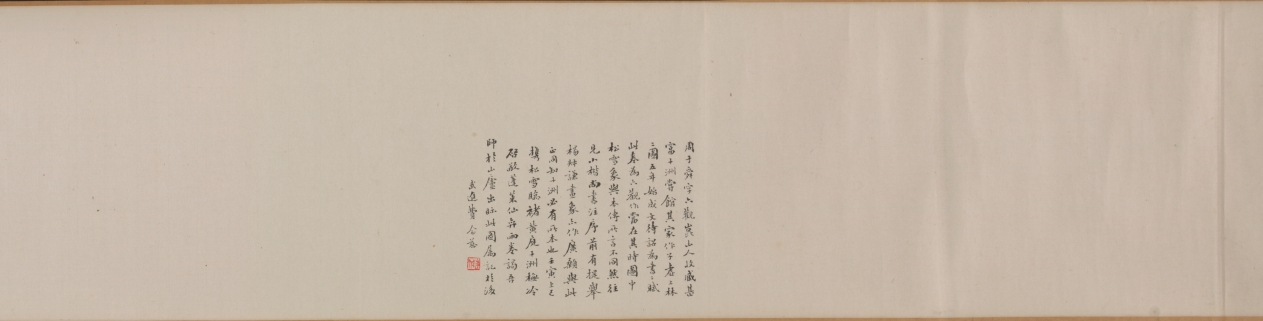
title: Zhao Mengfu Writing the Heart (Hridaya) Sutra in Exchange for Tea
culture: China, Ming dynasty (1368–1644)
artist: Qiu Ying (Chinese, 1494–1552)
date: 1542–43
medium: handscroll, ink and light color on paper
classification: Painting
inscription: Inscription accompanying text of "Heart" sutra, by Wen Zhengming 文徵明 (1470-1559): Zhengming 徵明, written in a boat at Kunshan 崑山, on the twenty-first day of the ninth month, in the renyin 壬寅 year, the twenty-first year of the Jiajing era [1542].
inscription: Colophon by Wang Shih-mou: Chou Yü-shün [Feng-lai] of K'un-shan was a scholarly, refined connoisseur of antiquities. He had acquired the poem written by Chao Ch'eng-chih [Chao Meng-fu] about the exchage of tea for Chao's calligraphy of the Prajna sutra. But the sutra itself, also written by Chao Meng-fu, is lost. He therefore asked Ch'iu Shih-fu [Ch'iu Ying] to do a painting and had Wen Cheng-ming, the artist-in-attendance, write the Hridaya Sutra in the "small, regular" style for replacement. Both works are so excellent that even Chao Meng-fu himself would certainly applaud if he should be reborn to see them. I, Shih-mou, had gotten possession of this scroll from the family of Chou Yü-shün, and since it was so wonderfully matched with one of the treasures in my collection. the Hridaya Sutra written by Chao Meng-fu for Priest Li in "running script," like the reuniting of two halves of a jade pi, I completed the scroll with the several colophons written for the "tea-exchange" poem. I did this because the painting of Ch'iu Ying and the calligraphy of Wen Cheng-ming are definitely masterpieces by themselves with absolutely no need to depend on any of the colophons written for the Chao Meng-fu poem. Furthermore, the two sons of Wen Cheng-ming, Shou-ch'eng [Wen P'eng] and Hsiu-ch'eng [Wen Chia]. have each written a colophon explaining the reason for replacing the calligraphy. As their writings are both acceptable for high standard, I didn't want to throw them away. [So by separating these into two scrolls] I was able to get two complete works of art in one clever stroke. I was quite pleased with myself, and hope that those who see this scroll shall not get suspicious because of the missing colophons. Wang Shih-mou wrote in his Jih-sun-chai study, on the first day of the tenth month, in the chia-shen year of the Wan-li era [1584].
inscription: Colophon by Wen P'eng: I-shao [Wang Hsi-chi] wrote in exchange for a flock of geese. Su Tung-po wrote in exchange for meat. Both episodes have become legends of a thousand years. Sung-hsüeh [Chao Meng-fu] "teased" Priest Kung for tea, and the story was immediately immortalized in the poems by all the famous scholars of the times. Indeed, how could one say his humor and elegance are not equal to the ancient worthies? Unfortunately, the poetry has survived but the writing of the sutra is lost. Yü-shün [Chou Feng-lai] therefore asked my father to make up the writing and so here is the complete work of art. Respectfully inscribed by Wen P'eng in the mid-summer of 1543.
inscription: Colophon by Wen Chia: Sung-hsüeh [Chao Meng-fu], in exchanging tea leaves for his writing of the Prajna, had put himself in the company of Yu-chün [Wang Hsi-chih] who exchanged geese for his writing of the Huang-t'ing sutra [the Yellow Chamber, or the Wai-ching ching, a Taoist text attributed to the Yellow Emperor]. However, was this romantic and cultivated gesture really intended for such small things? Actually, he was only proud that the excellence of his calligraphy had made him worthy to be the successor of the Ch'in Dynasty master. Since, very unfortunately, Chao Meng-fu's writing [of the Prajna] was already lost, my father therefore agreed to replace it, and did the calligraphy in the style of the Yellow Chamber. In addition, Yu-shün [Chou Feng-lai] had asked Mr. Ch'iu Shih-fu [Ch'iu Ying] to do a painting of the sutra writing story in the style of Li Lung-mien at the head of the scroll. Now it would seem the entire episode should go down in history for immortality. Respectfully recorded by Wen Chia, on the eighth day of the eighth month, in the year of k'uei-mao [1543]. trans. WKH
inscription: 4 colophons and 23 seals: 1 colophon, dated 1543, and 2 seals of Wen Peng (1498-1573); 1 colophon, dated 1543, and 2 seals of Wen Chia (1501-1583); 1 colophon, dated 1584, and 3 seals of Wang Shih-mou (1536-1588); 2 seals of Chou Feng-lai (16th c.); 3 seals of Sung Lo (1634-1713); 5 seals of the Ch'ien-lung emperor (r. 1736-95); 1 colophon, dated 1902, and 1 seal of Fei Nien-tz'u (1885-1905); 4 seals of Wan-go H. C. Weng (b. 1918); 1 seal unidentified.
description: The Yuan dynasty calligrapher Zhao Mengfu (1254–1322) is said to have transcribed the Heart Sutra for a certain priest named Li in exchange for tea. Later, during the Ming dynasty, the professional painter Qiu Ying from Suzhou painted this scene for his patron. Here, Zhao Mengfu holds a brush and has a piece of paper laid out before him. On the table is an ink stone, an ink stick, and a small water dropper. Drops of water would dissolve the ink stick into liquid ink when it was ground on the flat square stone.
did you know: Qiu Ying was born to a peasant family, but his natural talent led him to a successful career as a professional painter with wealthy patrons.